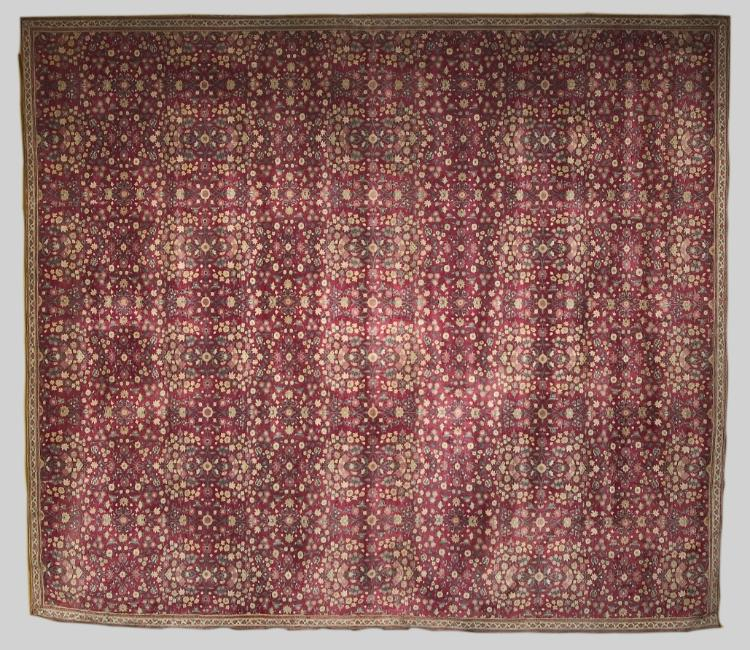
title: Woolen carpet with millefleurs decoration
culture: India, Kashmir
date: early 1600s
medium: Pashmina (wool): asymmetrical knot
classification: Carpet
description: Pashmina, a very fine fiber made from the fleece of Himalayan goats, was a material highly valued at the Mughal courts. Luxury rugs functioned in several ways, including as insulators for palatial and ceremonial spaces and as framing devices for important figures. In a biography of the Mughal emperor Akbar (reigned 1556–1605), called the Ain-i-Akbari, the court historian Abu’l Fazl (1551–1602) poetically wrote that such textiles created “a beautiful flowerbed.” The description is apt, as this carpet features an impressively symmetrical floral design known as millefleurs, or “thousand flowers” in French. Viewing several of these carpets and other hangings at once would have been visually impressive for court attendees.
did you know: The border contrasts with the central design, putting red flowers against a white background.